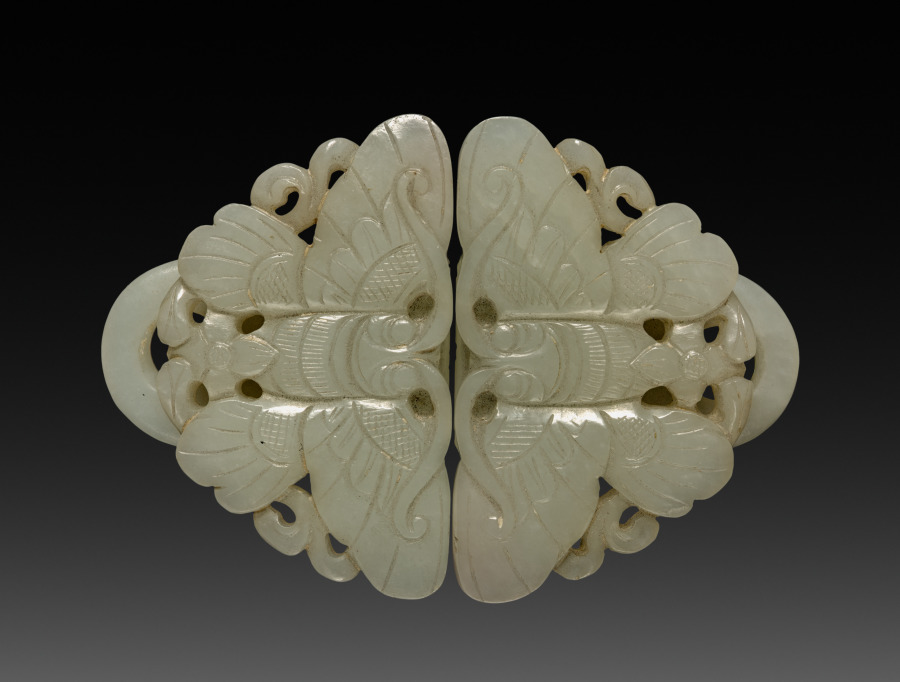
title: Butterfly Buckle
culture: China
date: 1800s–1900s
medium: white jade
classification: Jewelry